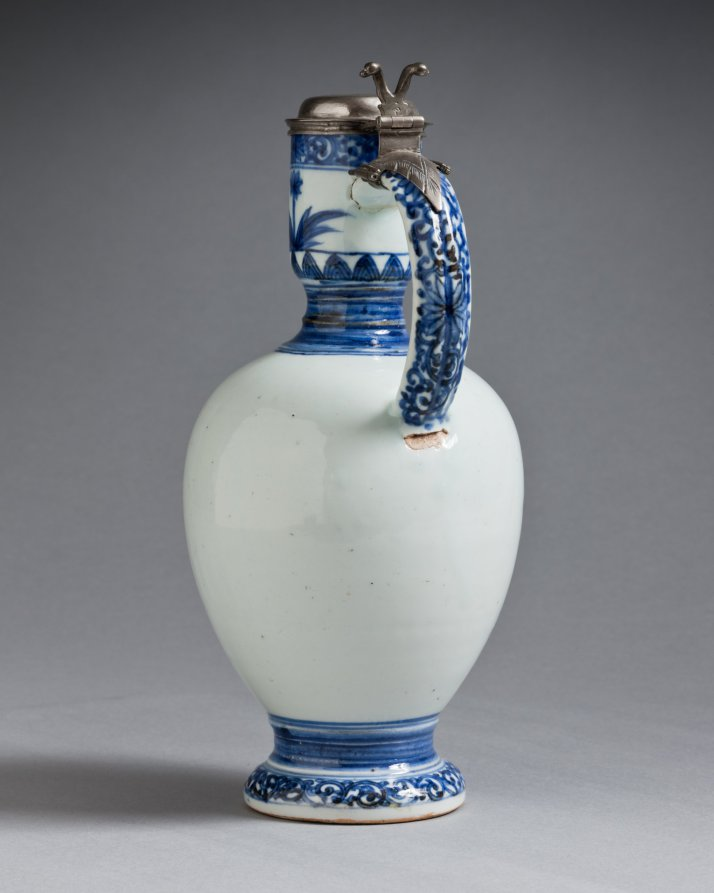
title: Jug with Silver Mounts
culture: Japan, Edo period (1615–1868)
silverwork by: Barent van Leeuwen (Dutch, 1637–1682)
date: c. 1662–76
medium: porcelain with underglaze blue decoration and silver mounts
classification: Ceramic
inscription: [on silver]: town mark for Amsterdam; lion rampant crowned (alloy mark for 0-934 silver); d (date letter for 1666), maker's mark of Barent van Leeuwen.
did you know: The coat of arms on this jug are those of the Valckenier family, active in the Dutch East India Company.